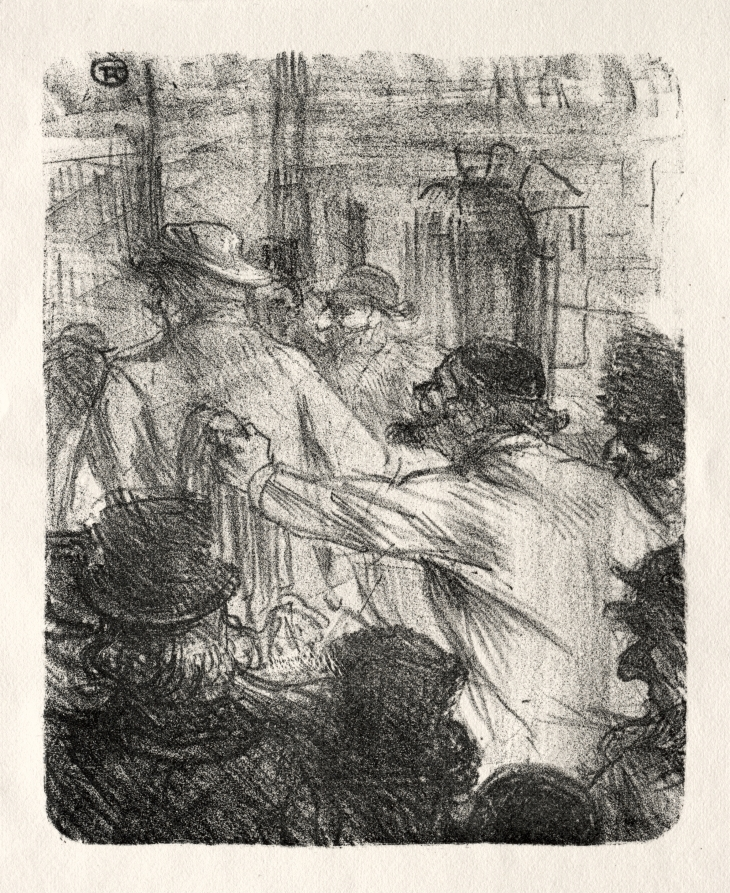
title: Au pied du Sinaï: La Halle aux Draps, Cracovie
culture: France, 19th century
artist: Henri de Toulouse-Lautrec (French, 1864–1901)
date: 1898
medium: lithograph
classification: Print